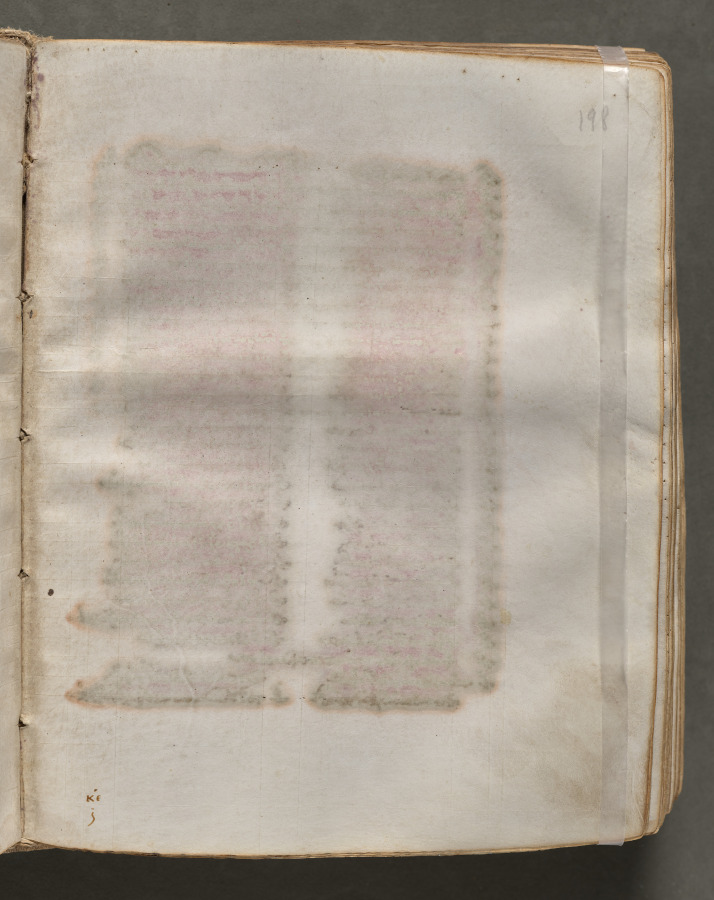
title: Text, folio 198 (recto), from a Gospel Book with Commentaries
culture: Byzantium, Constantinople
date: c. 1000–1100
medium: ink, tempera, and gold on vellum; leather binding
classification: Bound Volume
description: Each of the four gospels in this book opens on a page with brilliantly illuminated borders depicting the author of the text as well as birds-principally peacocks, symbols of the immortality of the soul-and fountains, representing the fountain of life and the salvation of the soul. This volume consists of 428 leaves with texts in Greek. Its level of sophistication suggests that it was probably written and decorated in a monastery in Constantinople.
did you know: Gospel Books were carried in procession through Byzantine churches.